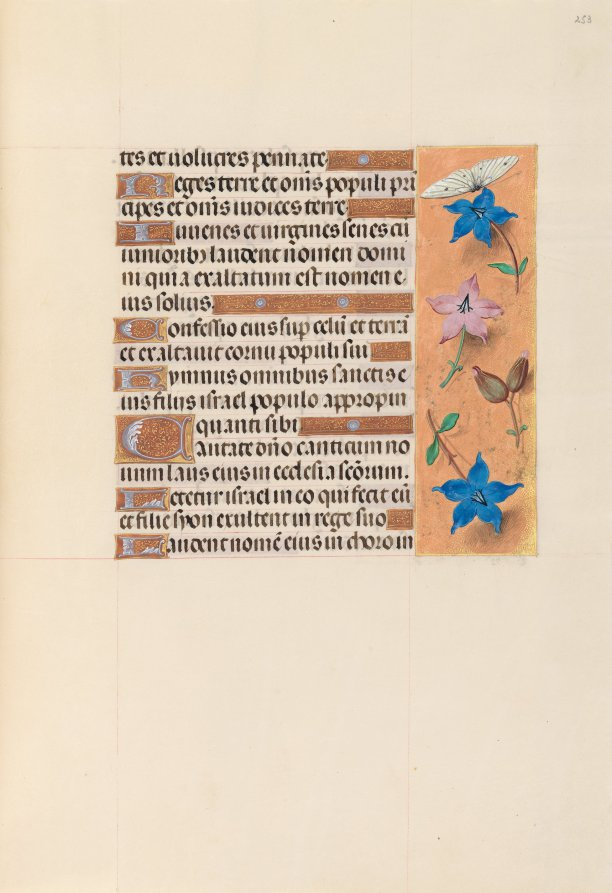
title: Hours of Queen Isabella the Catholic, Queen of Spain: Fol. 253r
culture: Flanders, Ghent and Bruges, late 15th century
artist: Master of the First Prayerbook of Maximillian (Flemish, c. 1444–1519)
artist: and Associates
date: c. 1500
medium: ink, tempera, and gold on vellum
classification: Bound Volume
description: This manuscript was illuminated by a circle of at least five highly organized manuscript painters active in the Flemish cities of Ghent and Bruges. The principal illuminator was Alexander Bening, who painted the majority of the book's miniatures. Manuscripts produced by this circle of artists are renowned for the decoration of their borders, which typically feature a rich variety of realistically-painted flowers, birds, and butterflies. This prayer book, called a book of hours, was intended not for a cleric, but for the private devotions of a lay person-in this case, Isabella the Catholic, Queen of Spain (1451-1504). Isabella's coat of arms embellishes the book's frontispiece. It is unlikely that the book was commissioned by the Queen herself; rather, she probably received it as a diplomatic gift from someone courting her patronage, perhaps Cardinal Francisco Jimenez de Cisneros. A Franciscan friar, Jimenez was dependent upon Isabella for his advancement, first to the post of Queen's confessor in 1492, and then to Archbishop of Toledo in 1495.